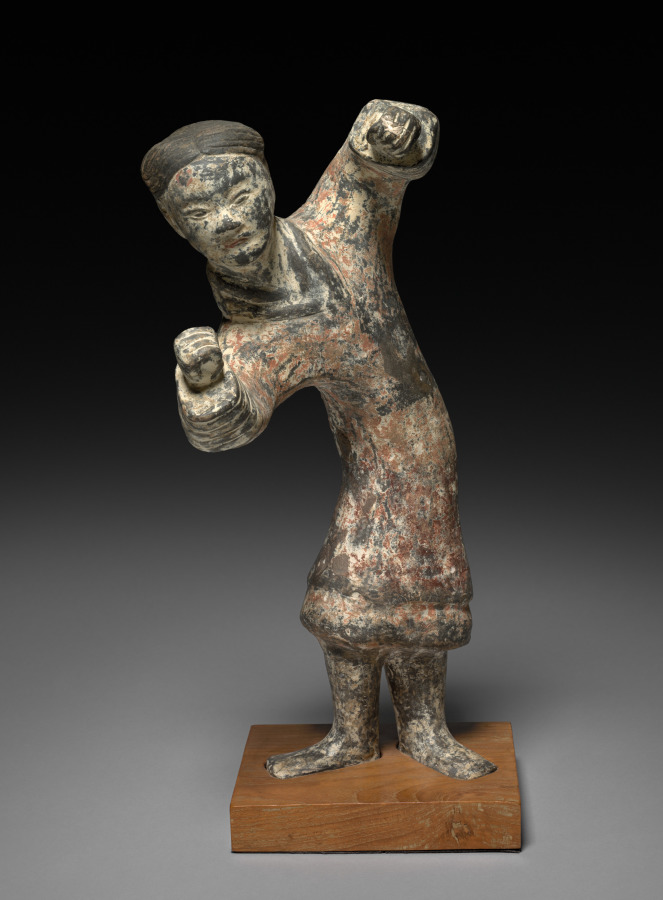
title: Dancing Figure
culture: China, style of Han dynasty (202 BCE–220 CE)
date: c. 1850–c. 1950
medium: painted plaster of Paris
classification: Sculpture